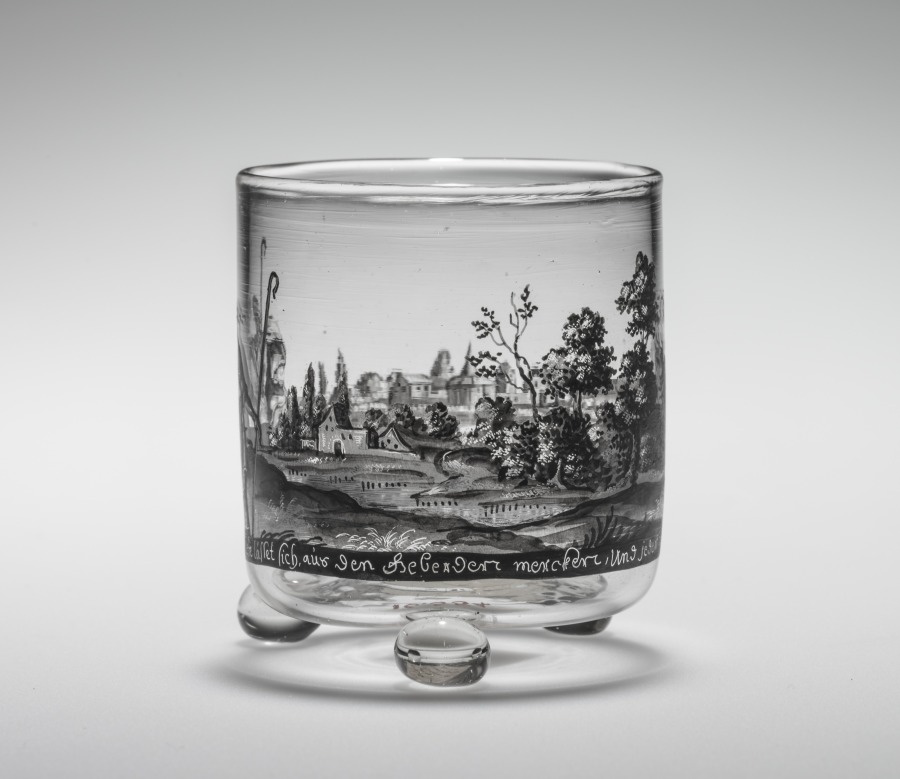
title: Tumbler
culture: Germany, Nuremberg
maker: attributed to Johann Schaper (German, 1635–1670)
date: 1670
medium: glass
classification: Glass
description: Johann Schaper (1621-1670) was a German painter of stained glass, mainly working in Nuremberg and Regensberg, who later turned to decorating glass and ceramics from his home, typical of artisans in the 17th century (hausmaler). His style was mainly a linear one in the manner of engravings, and often he worked in black (schwarzlot) or dark colors. Schaper was so influential that other artisans tried to copy his technique, in which he scratched out details with a needle, with varying degrees of success.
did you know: The fine details of the decoration on this tumbler were achieved by scratching away the enamel with a needle.